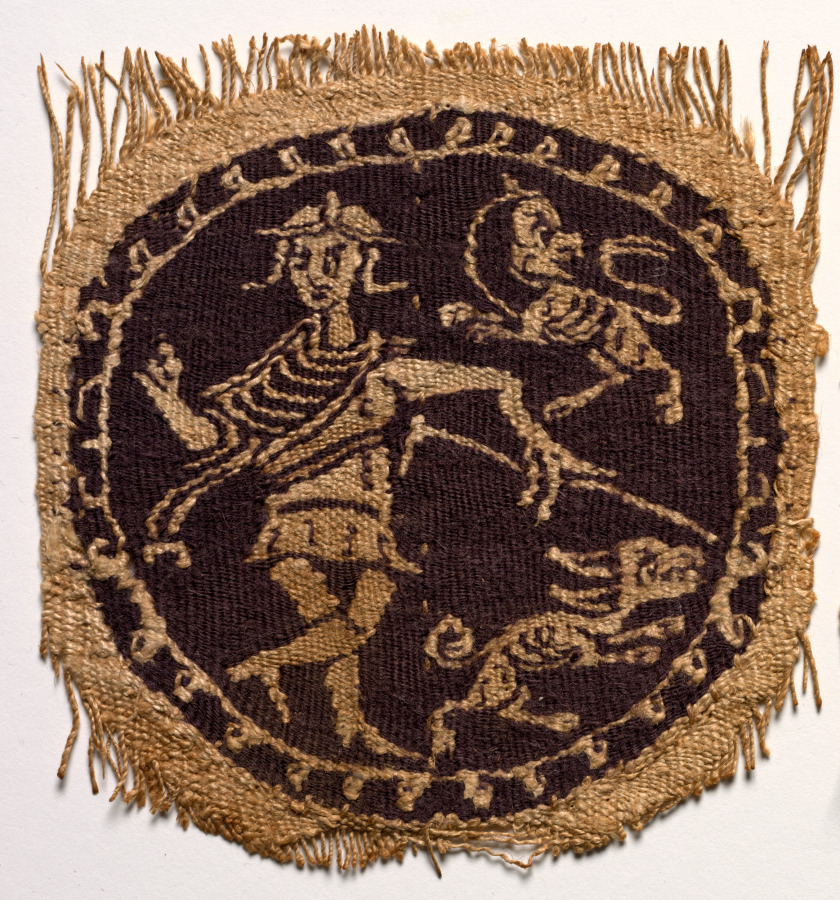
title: Segmentum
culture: Egypt, Umayyad period (661–750) or Abbasid period (750–1258)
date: 700s–900s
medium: Wool and linen: tapestry weave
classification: Textile